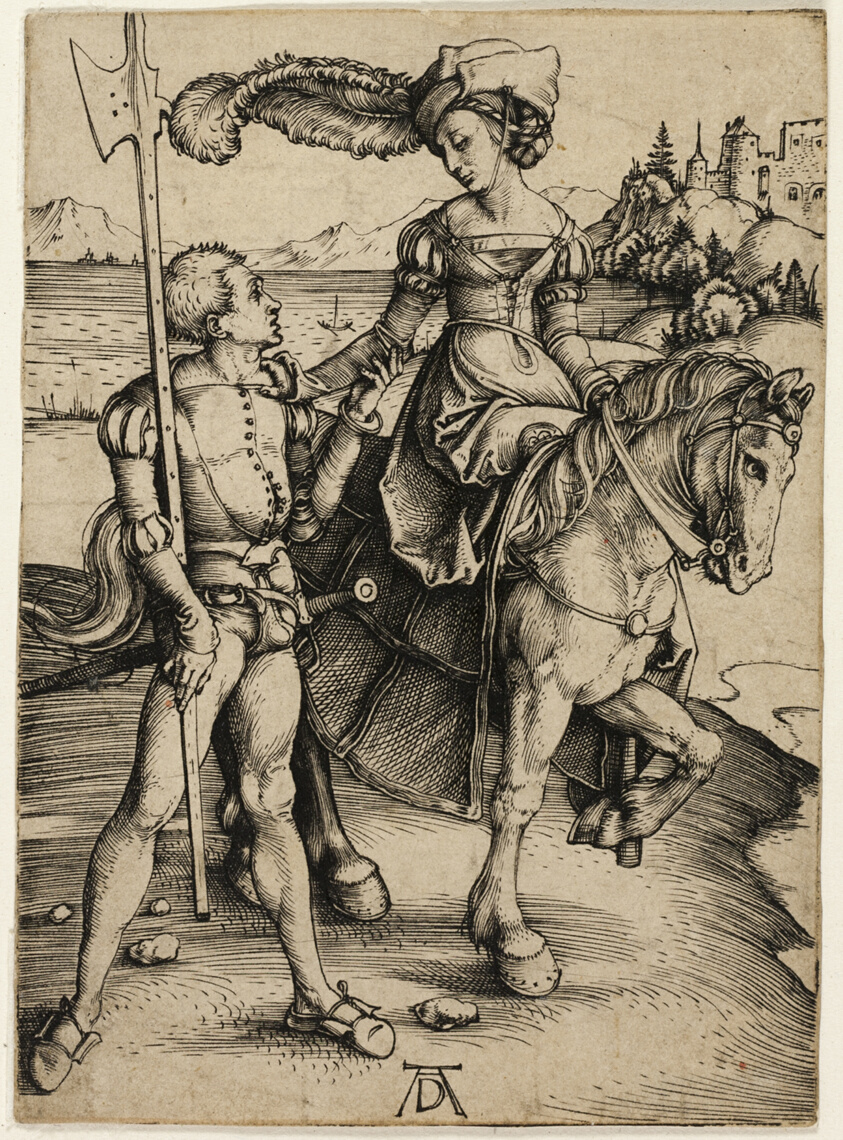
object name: Print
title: Lady on Horseback and Landsknecht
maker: Albrecht Dürer (German, 1471-1528)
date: c. 1497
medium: Engraving in black on tan laid paper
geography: Germany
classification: engraving; print; prints and drawing; paper